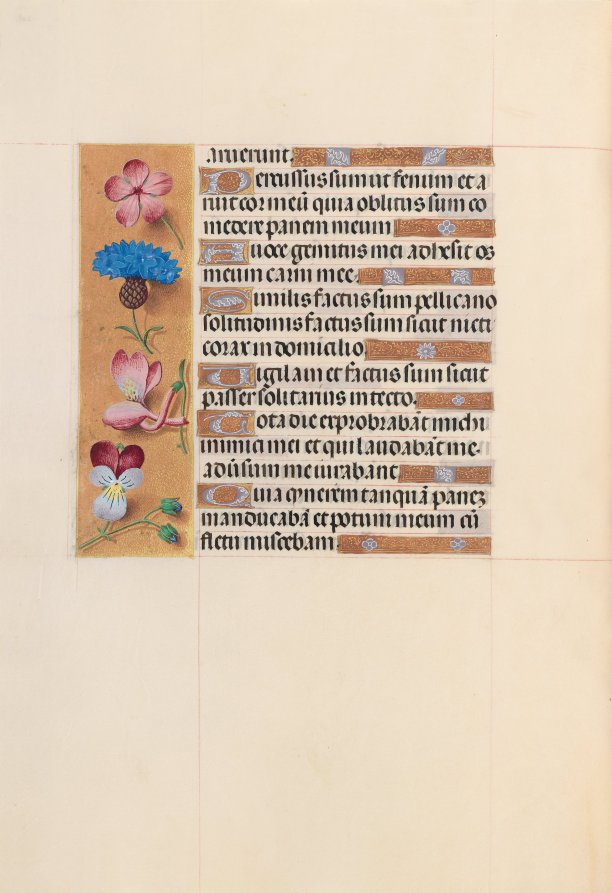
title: Hours of Queen Isabella the Catholic, Queen of Spain: Fol. 206v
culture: Flanders, Ghent and Bruges, late 15th century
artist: Master of the First Prayerbook of Maximillian (Flemish, c. 1444–1519)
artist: and Associates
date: c. 1500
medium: ink, tempera, and gold on vellum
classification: Bound Volume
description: This manuscript was illuminated by a circle of at least five highly organized manuscript painters active in the Flemish cities of Ghent and Bruges. The principal illuminator was Alexander Bening, who painted the majority of the book's miniatures. Manuscripts produced by this circle of artists are renowned for the decoration of their borders, which typically feature a rich variety of realistically-painted flowers, birds, and butterflies. This prayer book, called a book of hours, was intended not for a cleric, but for the private devotions of a lay person-in this case, Isabella the Catholic, Queen of Spain (1451-1504). Isabella's coat of arms embellishes the book's frontispiece. It is unlikely that the book was commissioned by the Queen herself; rather, she probably received it as a diplomatic gift from someone courting her patronage, perhaps Cardinal Francisco Jimenez de Cisneros. A Franciscan friar, Jimenez was dependent upon Isabella for his advancement, first to the post of Queen's confessor in 1492, and then to Archbishop of Toledo in 1495.